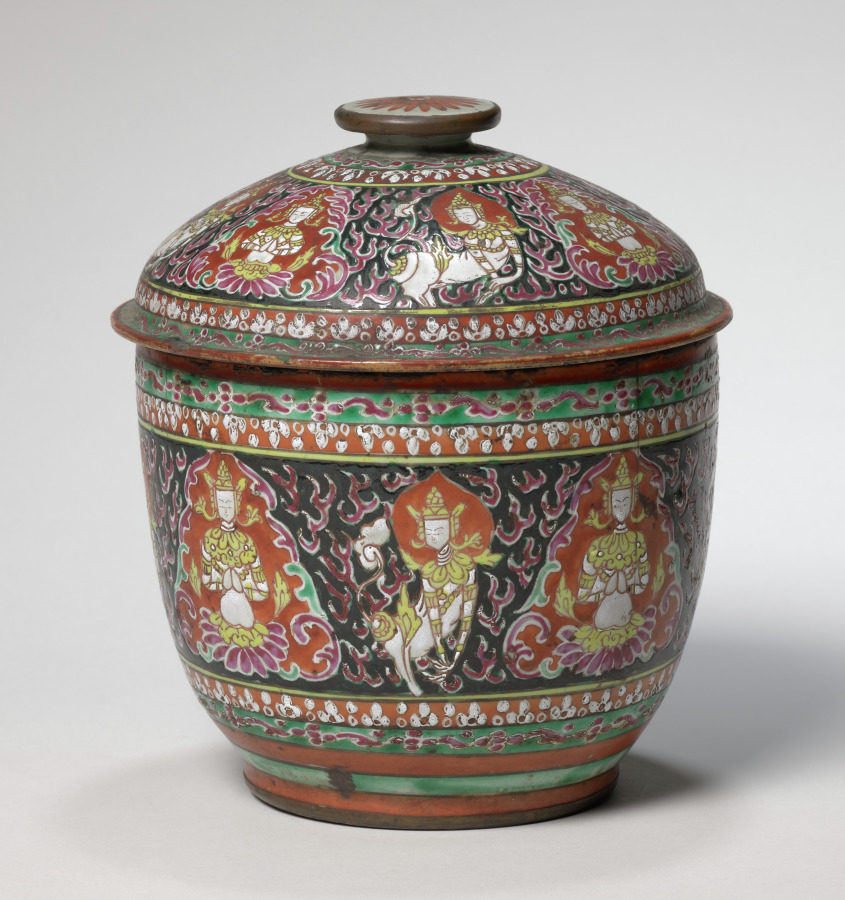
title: Jar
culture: Siam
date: 1800s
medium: porcelain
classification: Ceramic